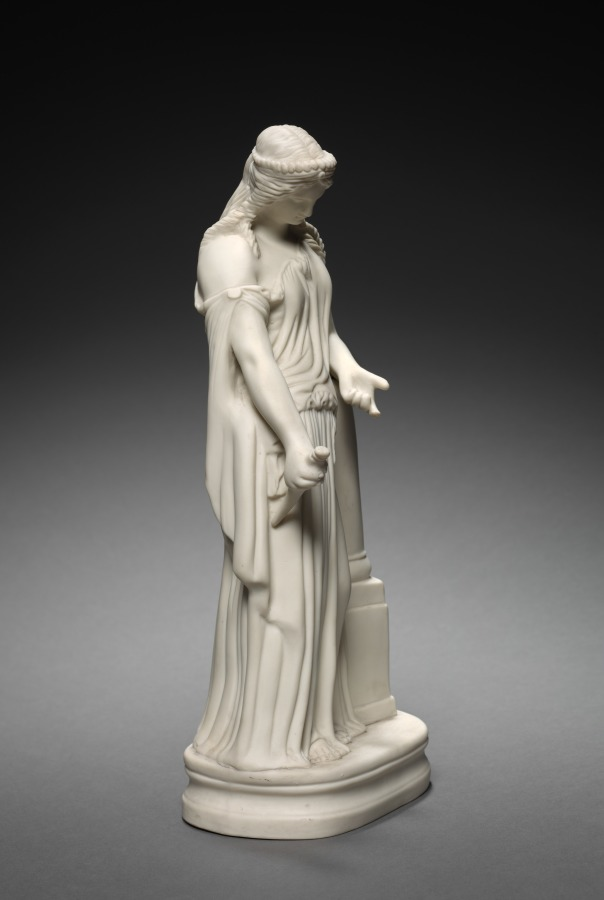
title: Figure of Medea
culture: England, 19th century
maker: W. T. Copeland & Sons (British)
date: c. 1870–1890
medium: Parian porcelain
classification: Ceramic